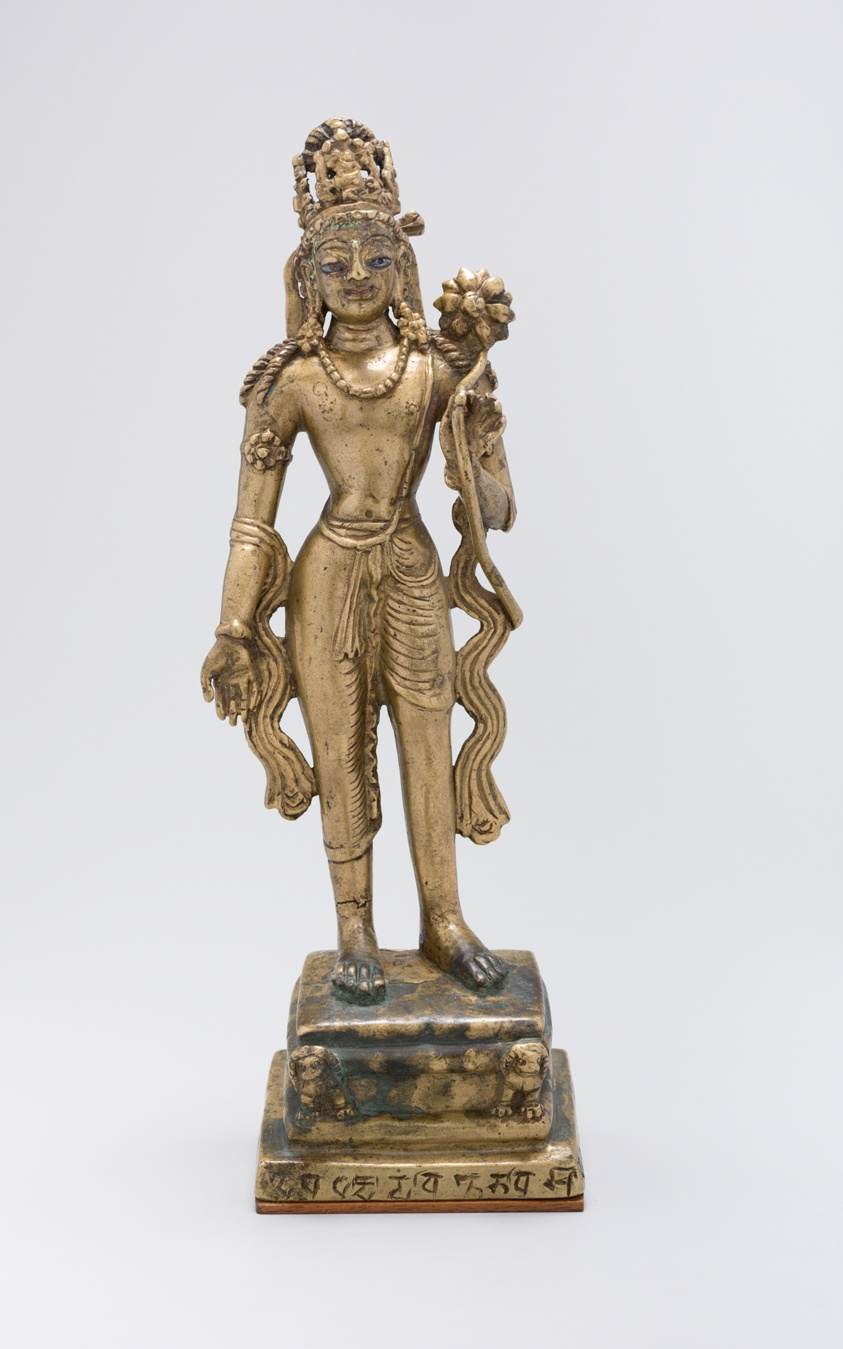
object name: Sculpture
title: Standing Bodhisattva Avalokiteshvara Holding a Lotus Flower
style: South Asian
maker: Pakistan; Khyber Pakhtunkhwa Province, Swat Valley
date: early 9th century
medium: Brass inlaid with copper and silver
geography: Swat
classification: brass; metal; sculpture; asian art